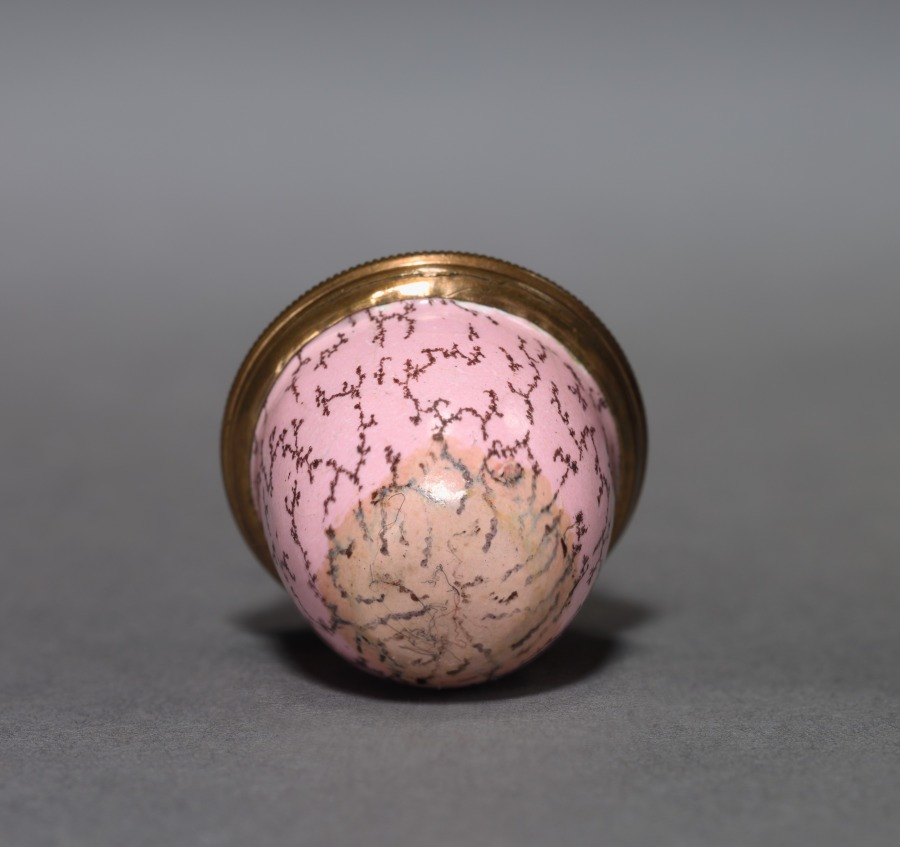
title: Thimble and Container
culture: England, mid-18th century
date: mid-18th century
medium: enamel on metal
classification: Enamel